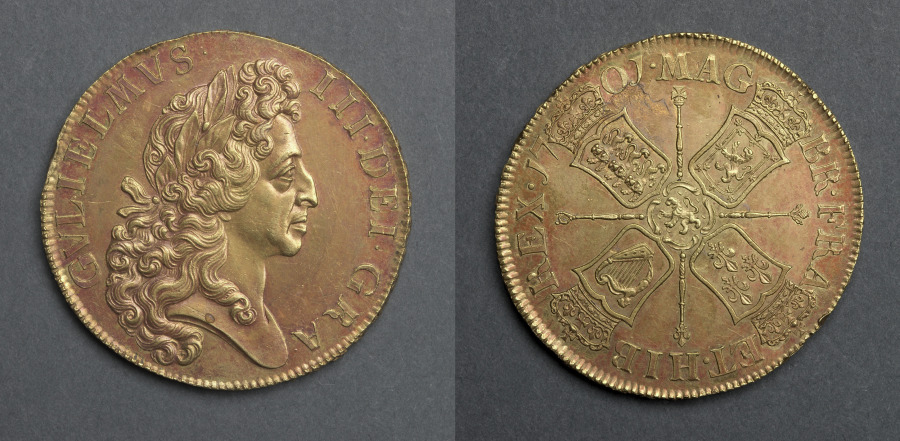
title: Five Guineas: William III (obverse); Four Shields and Lion of Nassau (reverse)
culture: England, William III, 1694-1702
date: 1701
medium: gold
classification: Coins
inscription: GVLIELMVS . III . DEI . GRA.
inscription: MAG BR∙ FRA ET∙ HIB REX∙ 1701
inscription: DECUS ET TUTAMEN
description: There were three types used on the five guinea coin of William III, who continued to reign long after the death of Mary. As hammered coinage was still in circulation along with the mill coins, the government decided to call in all the remaining hammered pieces in 1695, completing the reform of the coinage. This affected mostly the silver coinage. Gold was gradually reduced until the value of the guinea, when set against the silver coinage, was 21 shillings and 6 pence. The guinea finally settled at 21 shillings.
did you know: Of the coinage minted by William III, this type is considered the finest because of the profusion of detail.